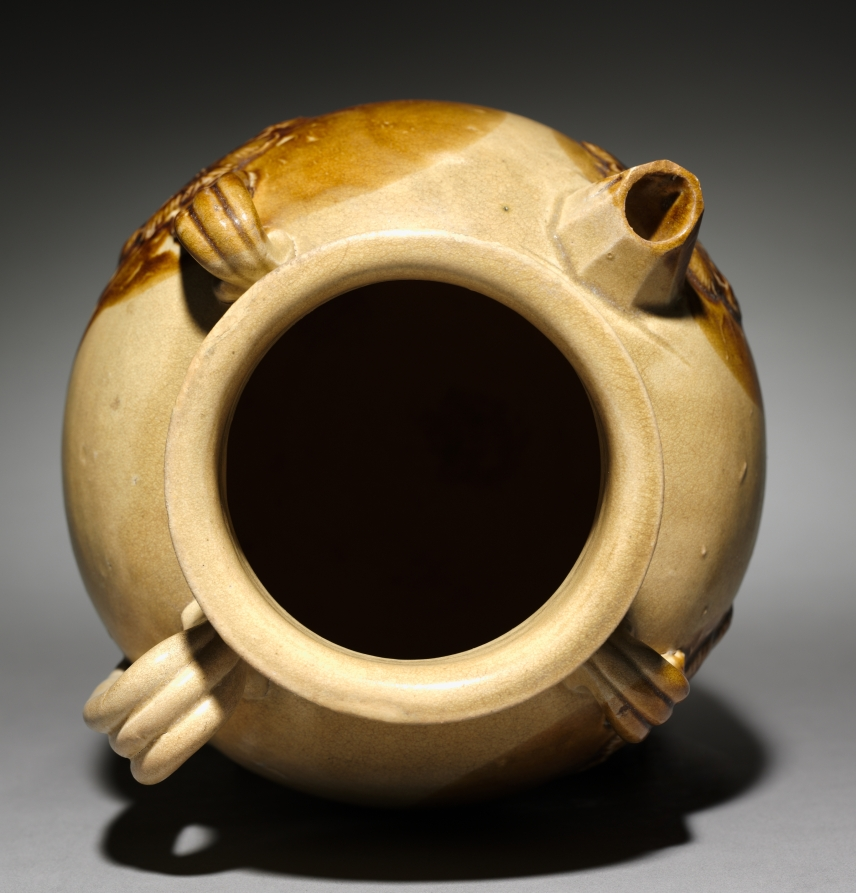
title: Ewer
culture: China, Hunan province, Tongguan, Tang dynasty (618–907)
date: 800s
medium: glazed stoneware with molded and applied decoration, Changsha ware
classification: Ceramic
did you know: Molded clay medallions with a stylized double-bird-and-leaf pattern were applied below the two side loops and the spout.